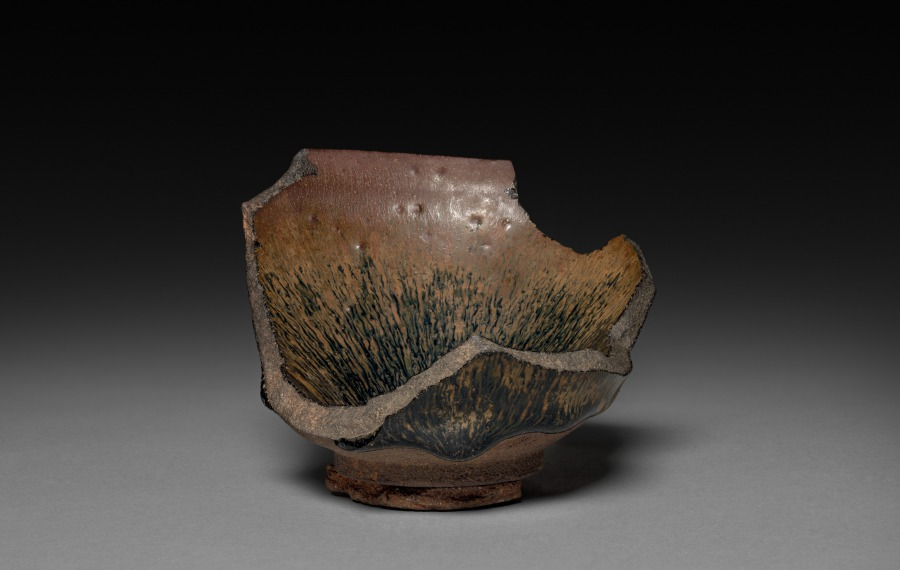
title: Shard of Tea Bowl: Jian ware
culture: China, near Shui ch'i, Song dynasty (960-1279)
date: 960–1279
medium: stoneware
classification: Ceramic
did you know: Jian ware was made of a very hard, coarse grain.